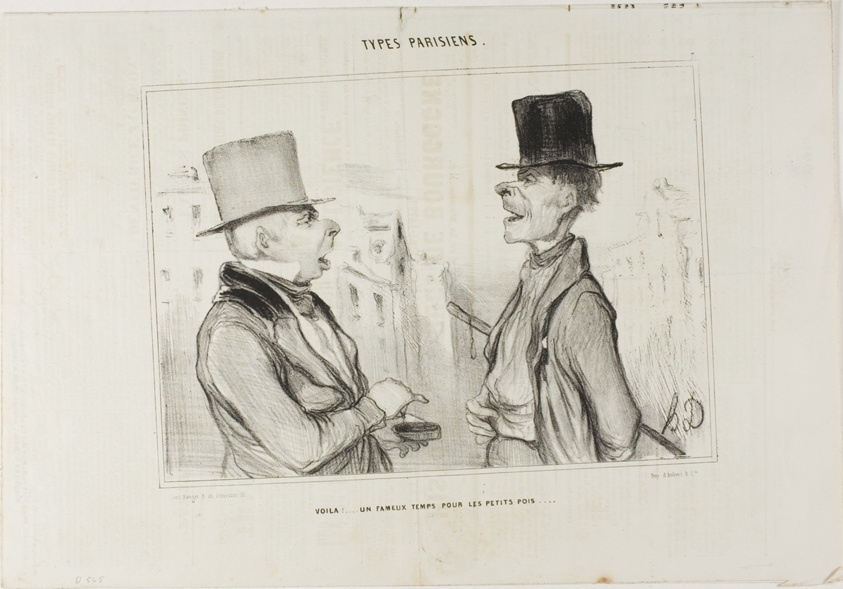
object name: Print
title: Great Times for Small Fry..., plate 7 from Types Parisiens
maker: Honoré Victorin Daumier; French, 1808-1879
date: published May 29, 1841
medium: Lithograph, with scraping on stone on cream wove paper (sheet folded to form four pages), with text below and letterpress verso (and recto when unfolded)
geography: France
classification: lithograph; print; prints and drawing